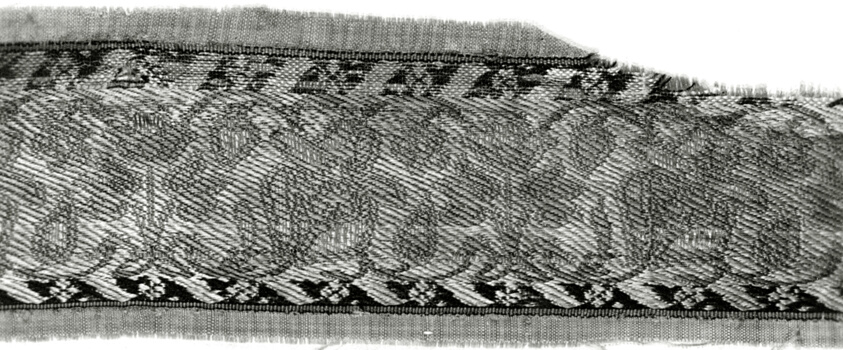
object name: Textile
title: Fragment (Border)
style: yazd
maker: Iran (Persia, Yazd)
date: 18th century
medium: Brocaded, twill weave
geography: Iran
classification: textile; weaving